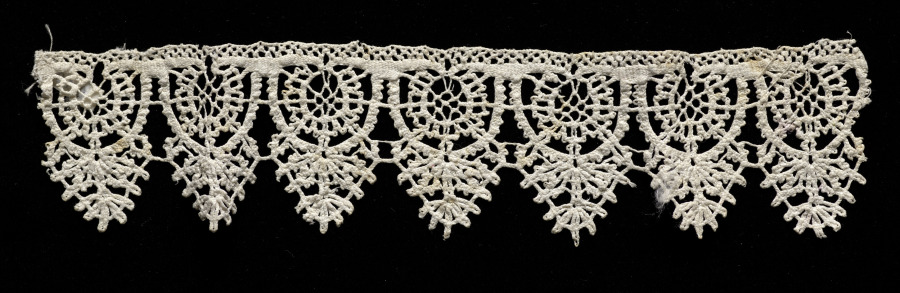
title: Lace Edging of Points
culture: Italy, Genoa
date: 1600s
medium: Bobbin lace (rose lace)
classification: Lace